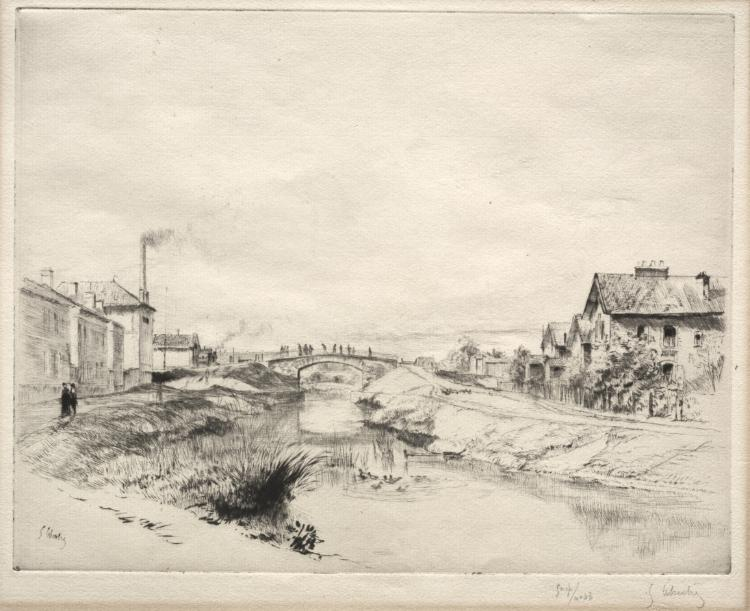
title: Industrial Section, Troyes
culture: France, late 19th-early 20th century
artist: Gustave Leheutre (French, 1861–1932)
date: c. 1880–1932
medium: drypoint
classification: Print